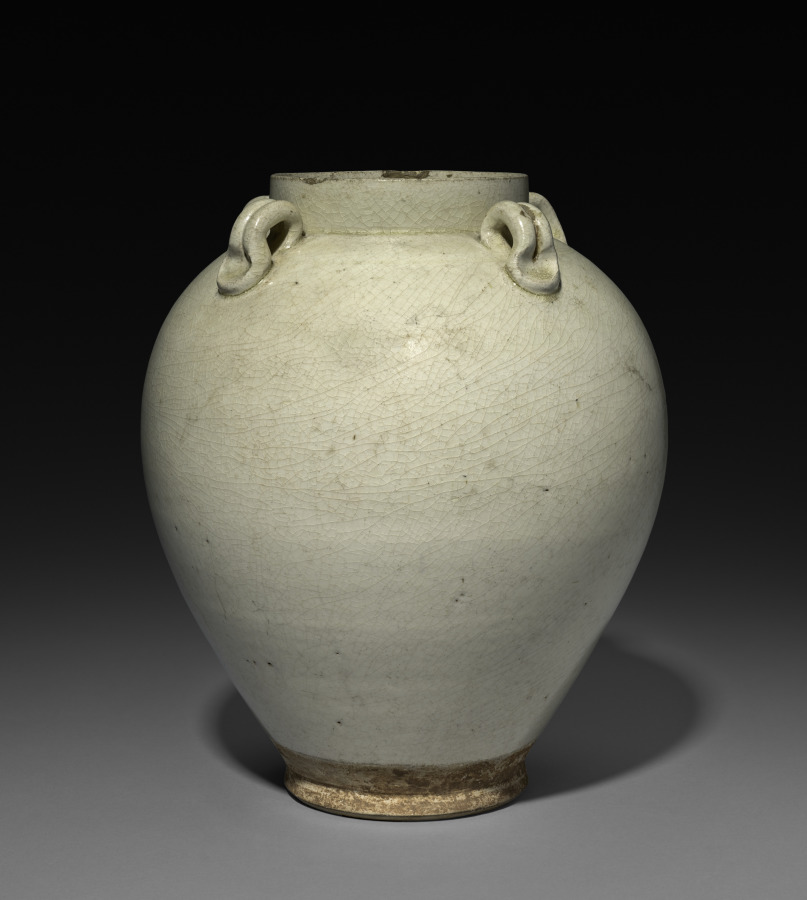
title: Jar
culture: China, Tang dynasty (618-907)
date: mid-600s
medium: glazed stoneware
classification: Ceramic